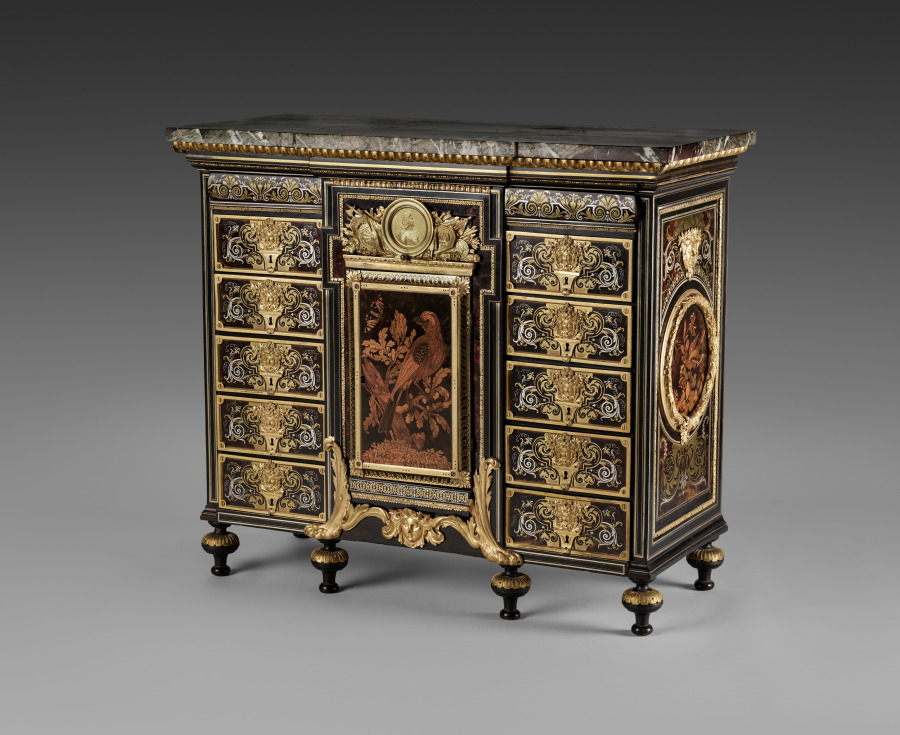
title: Cabinet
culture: France, late 17th Century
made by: André-Charles Boulle (French, 1642–1732)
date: c. 1690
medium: ebony, marquetry in metal and tortoise shell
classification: Furniture and woodwork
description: Appointed cabinetmaker to King Louis XIV in 1672, André-Charles Boulle became a master of furniture making in France during the late 1600s until his death in 1732. Known primarily for his use of marquetry, in which metal patterns are inlaid into tortoiseshell then applied within the veneered surface of the furniture, Boulle established a level of quality and craftsmanship few others could achieve. As a result, his work found favor at the royal court and among other aristocrats and diplomats eager to impress the king. The inclusion of a medallion depicting Louis XIV within the bronze decoration of this chest would have identified the owner with the royal court. Often exhibiting stout architectural proportions with elegant groups of inlaid motifs such as the parrot on the central panel of this chest, Boulle’s designs are an example of the intellectual fashion for contrasting ideas, materials, and motifs.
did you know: Originally designed to sit atop an elaborate tall stand, this chest was likely altered in the late 1700s to reduce its scale and height.